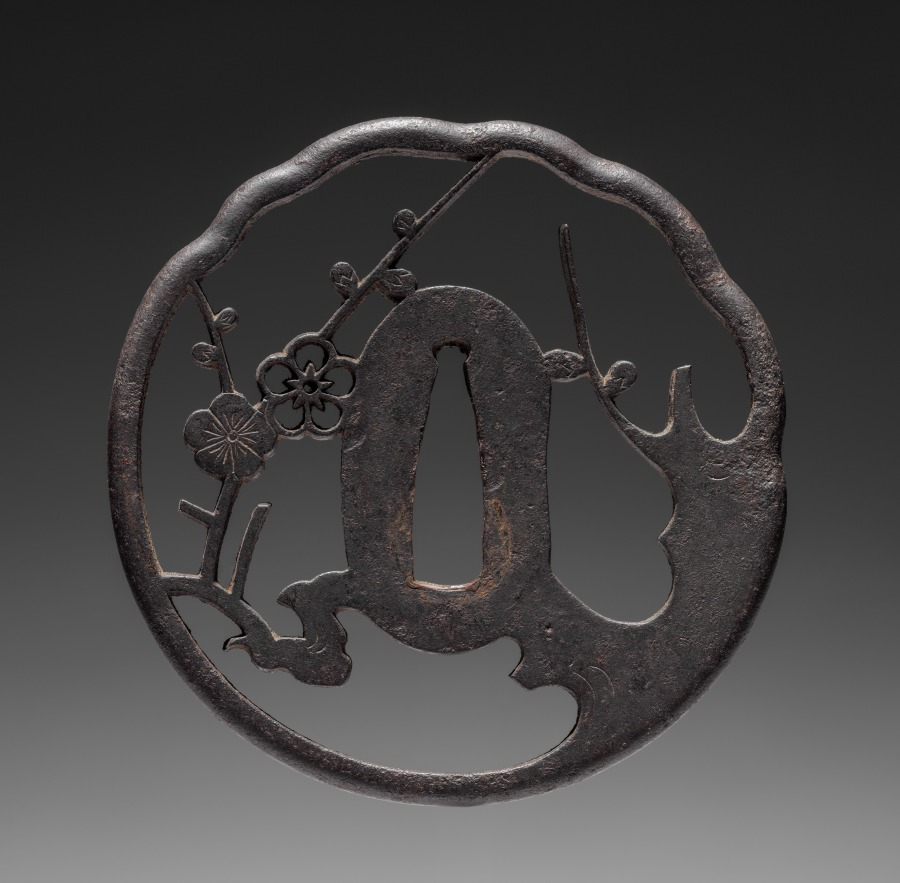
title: Sword Guard (Tsuba) with Plum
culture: Japan, Edo period (1615–1868)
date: 1615–1868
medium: iron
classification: Arms and Armor